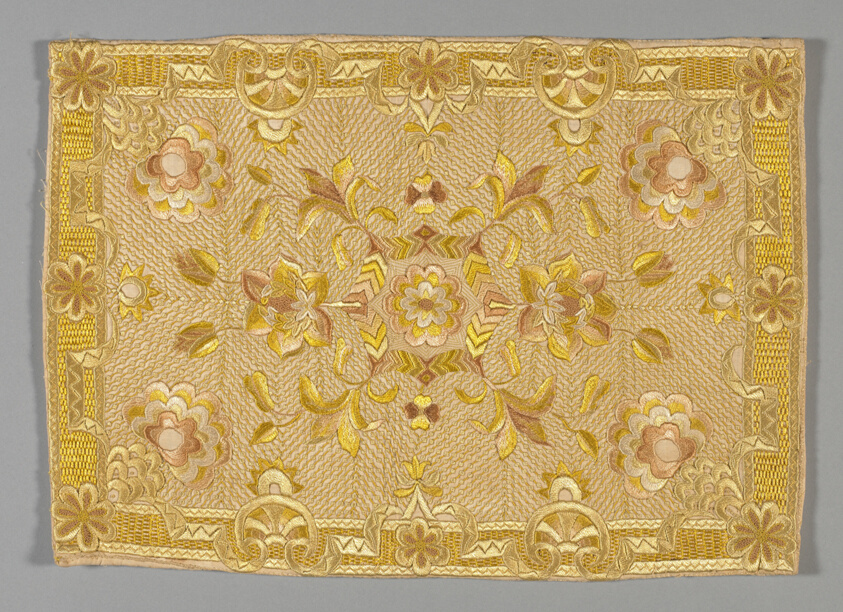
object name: Textile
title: Pillow Sham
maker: England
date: c.1720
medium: Cotton, plain weave, underlaid with linen, plain weave; embroidered with silk floss and silk yarns in back, herringbone, individual satin, and satin stitches; laid work, couching, and French knots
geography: England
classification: textile; needlework (visual works)